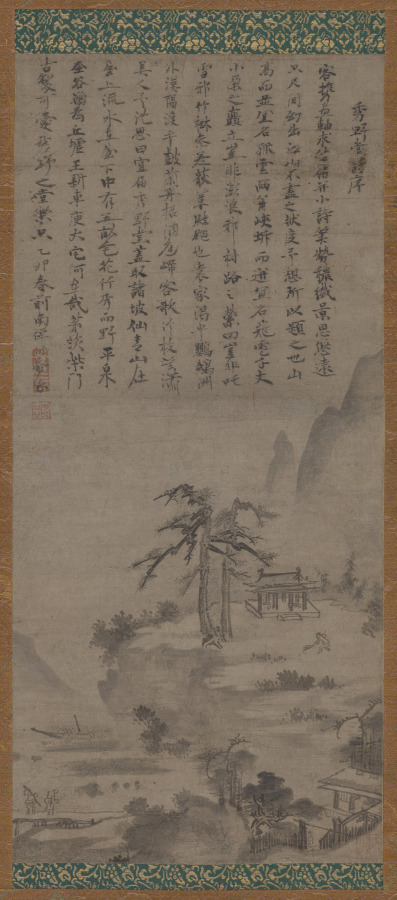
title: Shuyadō (Studio of Lofty Rusticity)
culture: Japan, Edo period (1615–1868)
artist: after Bunsei (Muncheong) (Japanese or Korean, active mid-15th century)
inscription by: after Chikuan Daien (Japanese, 1362–1439)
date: 1700s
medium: hanging scroll, ink on paper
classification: Painting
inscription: inscription by Chukuan Daien (Japanese, 1362-1439)m dated 1435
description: Hanging scrolls with assorted poems above and ink paintings below produced within Japan's Zen monastic community during the 1400s and 1500s are called poem-painting scrolls (shigajiku). This small painting was created much later in emulation of such works. While the original works often have a preface followed by poems by different monks, this composition has only a preface.